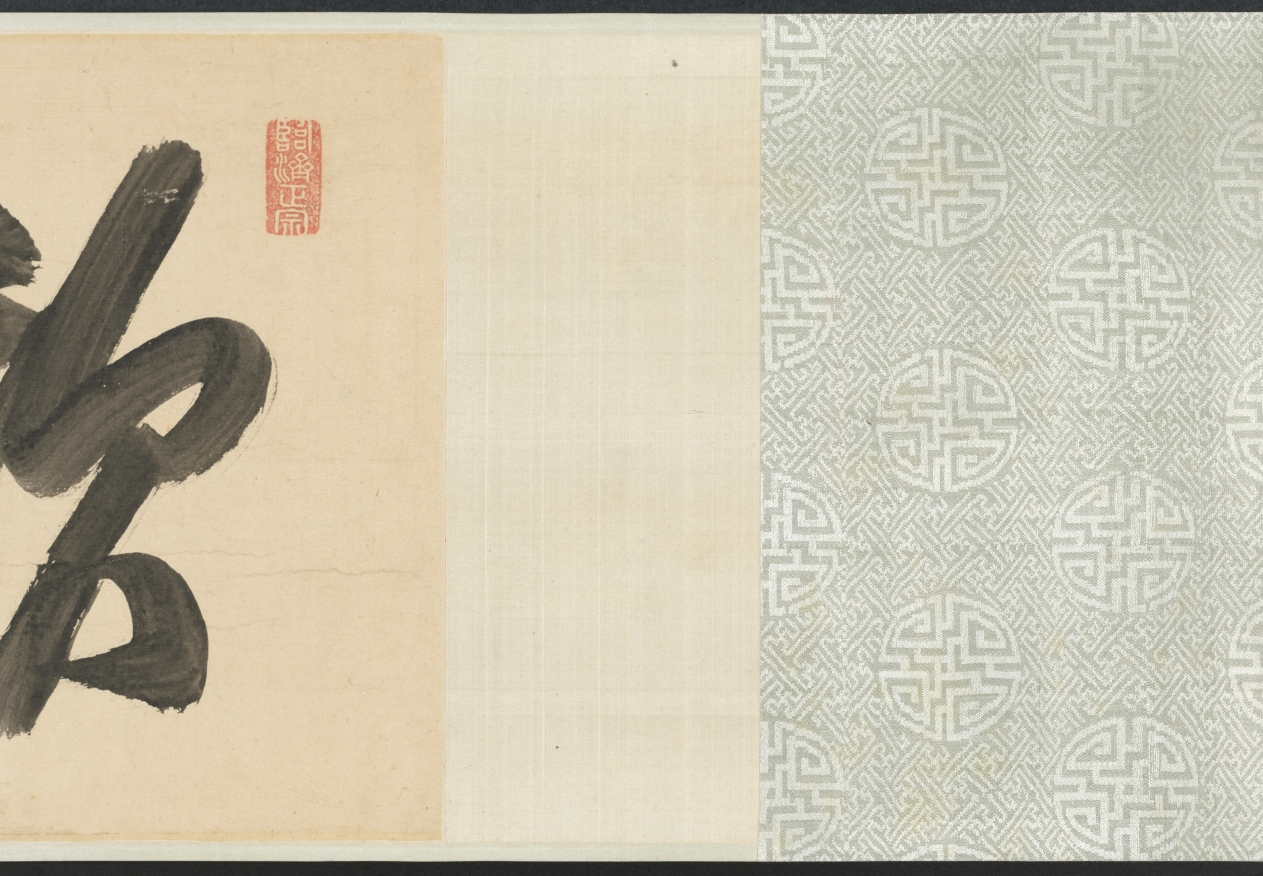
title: Purification at the Orchid Pavilion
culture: China, Qing dynasty (1644-1911)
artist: Fan Yi (Chinese, c. 1615–before 1688)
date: 1671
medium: Handscroll; ink and color on silk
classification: Painting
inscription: Artist's inscription, signature, and 2 seals: Painted by Fan Yi of Zhongfu during the second month of winter of the xinhai year [1671]. [2 seals] Fan Yi zhi yin, Zi yu yi.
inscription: Title on the frontispiece by Monk Yueshan (1629-1709).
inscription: 3 colophons and 13 additional seals: 1 colophon, dated 1707, and 6 seals of Yueshan; 2 colophons and 3 seals of Wong Kwan-Shut (Huang Junshi) 黃君實 (b. 1934); 2 seals of Fu Shen 傅 申 (b. 1937); 2 seals of Tessai Tomioka 富岡鐵齋 (1836-1924).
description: By the 1600s, the historic gathering at Lanting, Zhejiang province, in 353 CE was a common theme in Chinese painting. Originally based on a composition attributed to Li Gonglin (1049– 1106), now lost, Wu school artists revived the theme. Fan Yi, the brother of the artist Fan Qi from Nanjing, used delicate brushwork and luminous colors to depict the spring gathering.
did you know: The gathering’s host is in the Orchid Pavilion at the end of the scroll, representing an episode known as “Wang Xizhi Watching the Geese 王羲之觀鵝圖.”